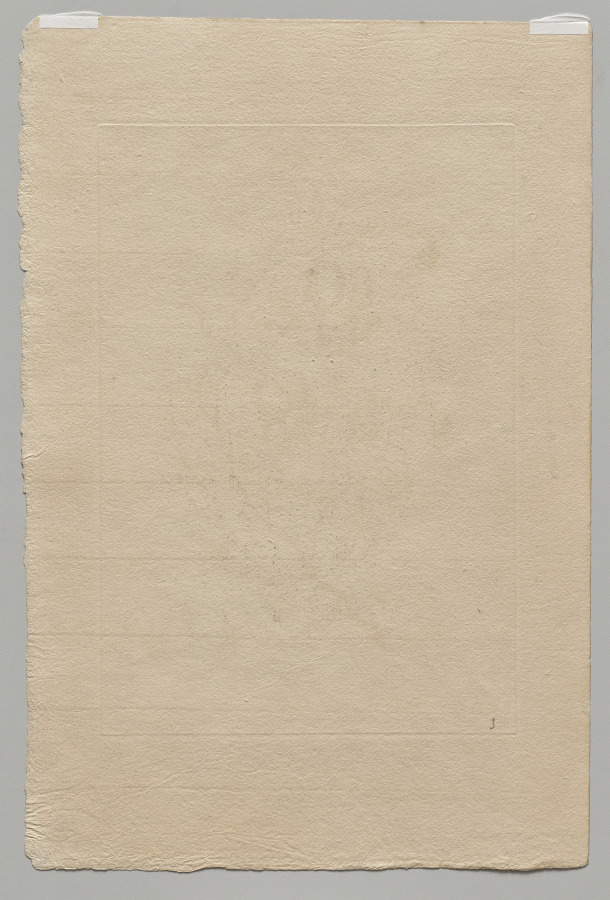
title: Persian Flowers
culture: France, 18th century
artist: Jean Baptiste Pillement (French, 1728–1808)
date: 1755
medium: etching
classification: Print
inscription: WM: a partial (bottom half) Dovecote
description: Jean Baptiste Pillement was one of the most influential designers of the Rococo period, known for his varied and prolific chinoiseries (European variants of Chinese and Japanese motifs). His designs were spread throughout Europe primarily via their translation into prints. This print is one of a set of six etched by Pillement himself. Each depicts a so-called “Persian” flower, largely fantasies, presenting strange, alien-like floral forms that could be adapted to various uses from textiles to wall decorations.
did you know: The artist Jean Baptiste Pillement was employed by Marie Antoinette to create decorations for her legendary retreat, the Petit Trianon, at Versailles.